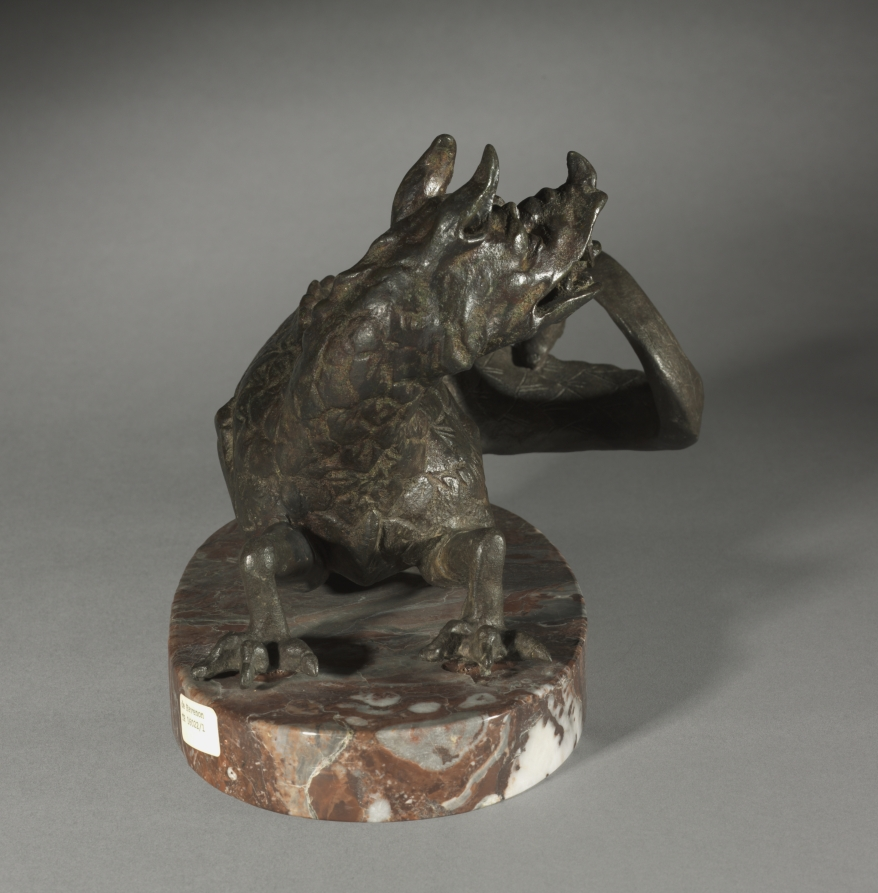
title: Dragon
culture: Italy, 18th century or later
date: 1700s or later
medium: bronze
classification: Sculpture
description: This figure was probably originally meant to serve as the decorative foundation to a larger object such as a casket or urn. In transition from decorative motif to independent work of art, the nether half may have been an addition, evidenced by the seam along its torso.